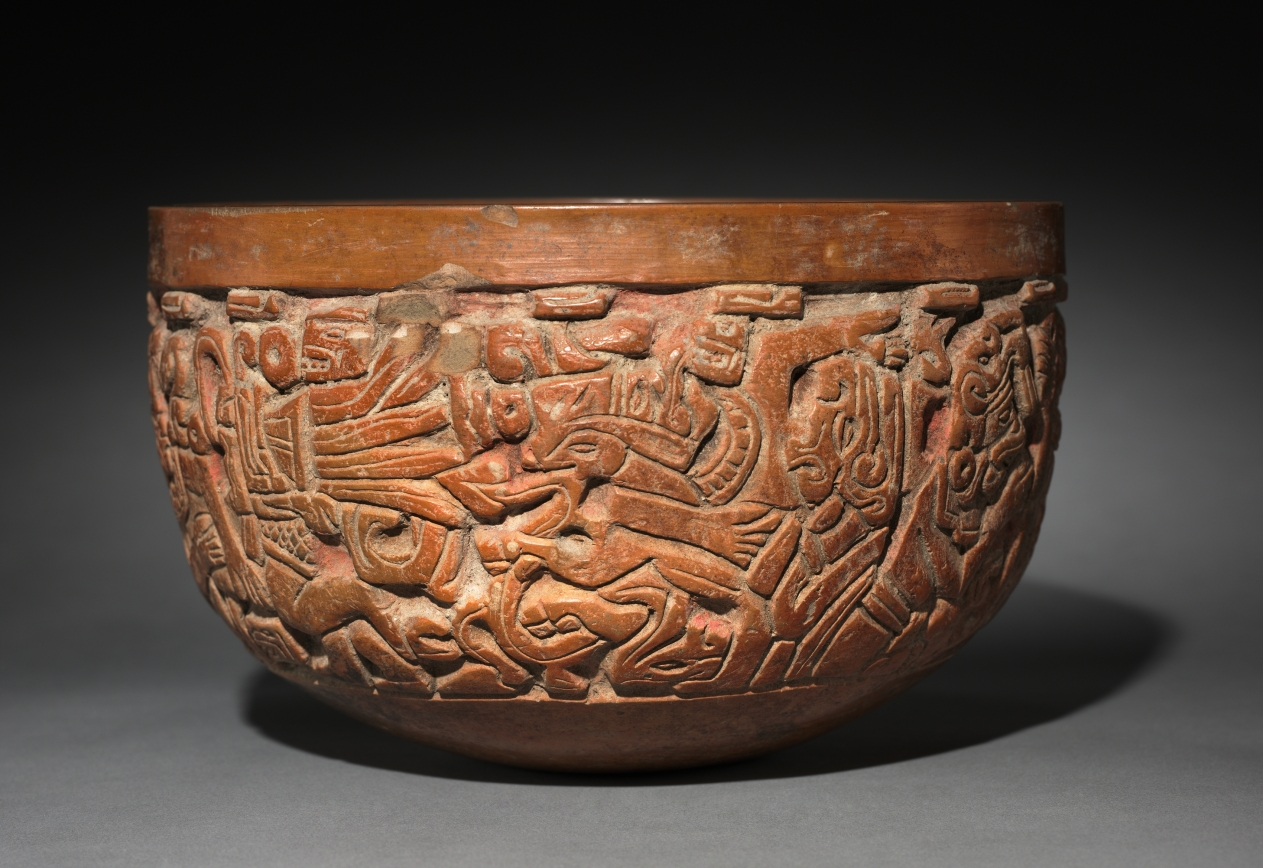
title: Bowl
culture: Mexico, South-central Veracruz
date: c. 500–1000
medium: molded, carved, and burnished pottery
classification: Sculpture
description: This mold-made ceramic bowl is decorated with a band of figures depicted in low relief. Most wear masks or grotesque headdresses, and four seem to struggle with deer. The meaning of the scene, which may be drawn from myth, is unknown.